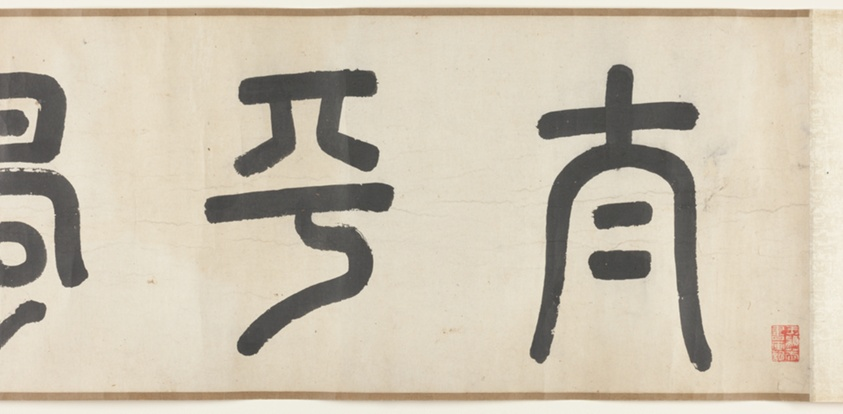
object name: Painting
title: Street Scenes in Times of Peace 太平風會圖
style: Chinese (culture or style)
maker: Zhu Yu (Zhu Junbi) 朱玉（朱君璧）; Chinese, 1293-1365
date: Yuan dynasty (1279–1368), 14th century 元朝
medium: Handscroll; ink and colors on paper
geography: China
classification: handscroll; painting; asian art